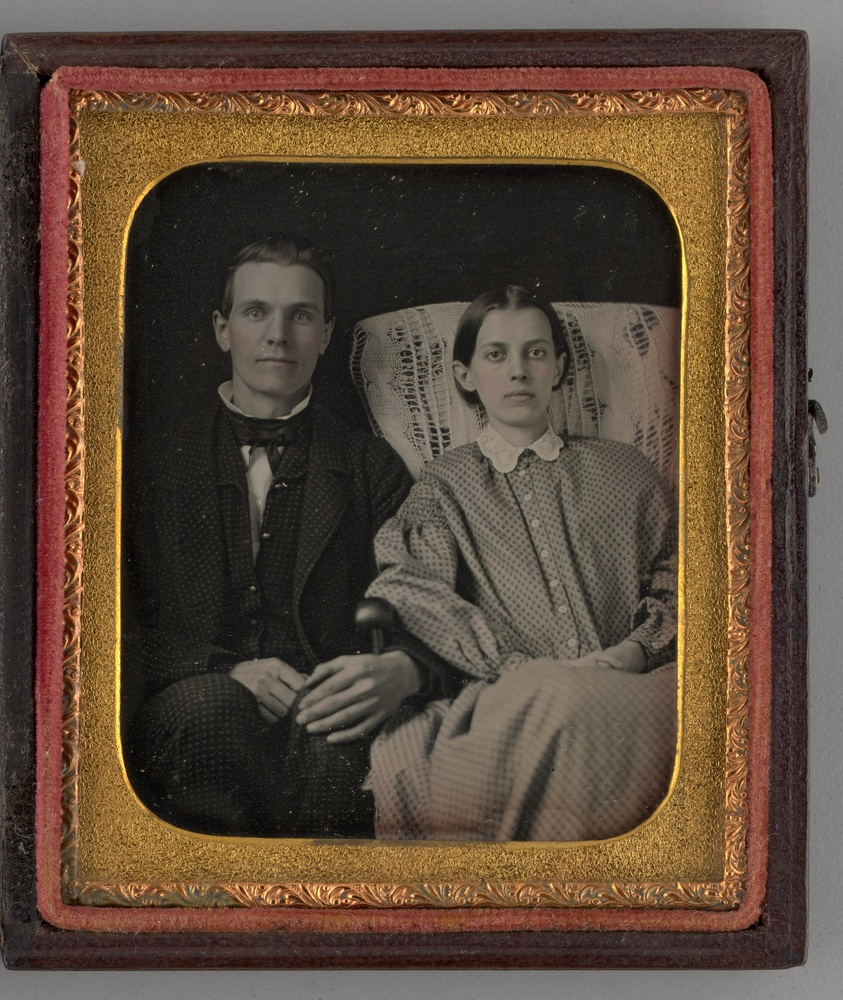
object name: Photograph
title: Untitled (Portrait of a Man and a Woman)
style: 19th century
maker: Unknown maker; American, 19th century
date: 1849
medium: Daguerreotype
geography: United States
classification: portrait; photography; photographic process; photograph; daguerreotype; portrait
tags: lundberg collection, photography, portrait, portraits, portraits: multiple subjects, couples, family